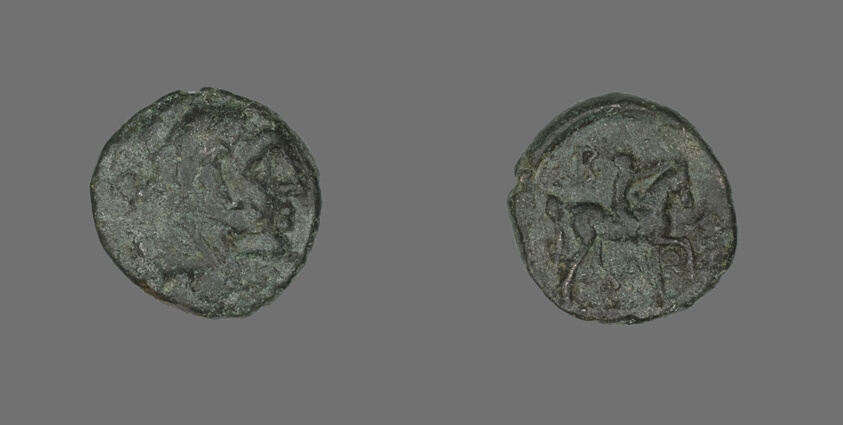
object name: Coin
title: Coin Depicting the Hero Herakles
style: greek, ancient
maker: Greek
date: 277-239 BCE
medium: Bronze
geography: Ancient Greece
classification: coin; ancient art